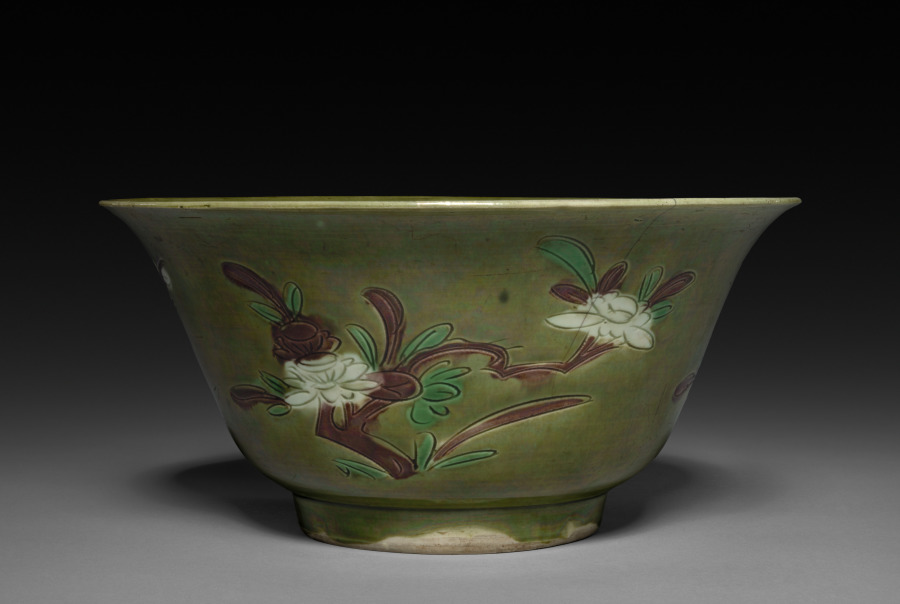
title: Brinjal Bowl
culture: China, Ming dynasty (1368–1644) to Qing dynasty (1644–1911)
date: 1368–1644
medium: white porcelain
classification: Ceramic